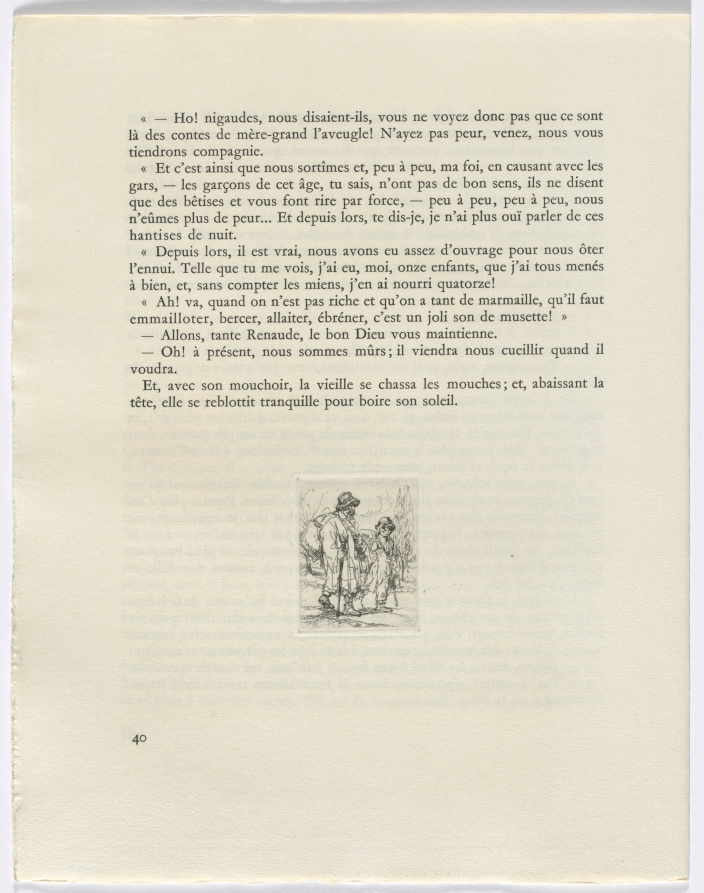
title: Frédéric Mistral: Mémoires et Recits by Frédéric Mistral: two figures walking (page 40)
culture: France, 20th century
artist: Auguste Brouet (French, 1872–1941)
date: 1937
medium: etchings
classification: Portfolio